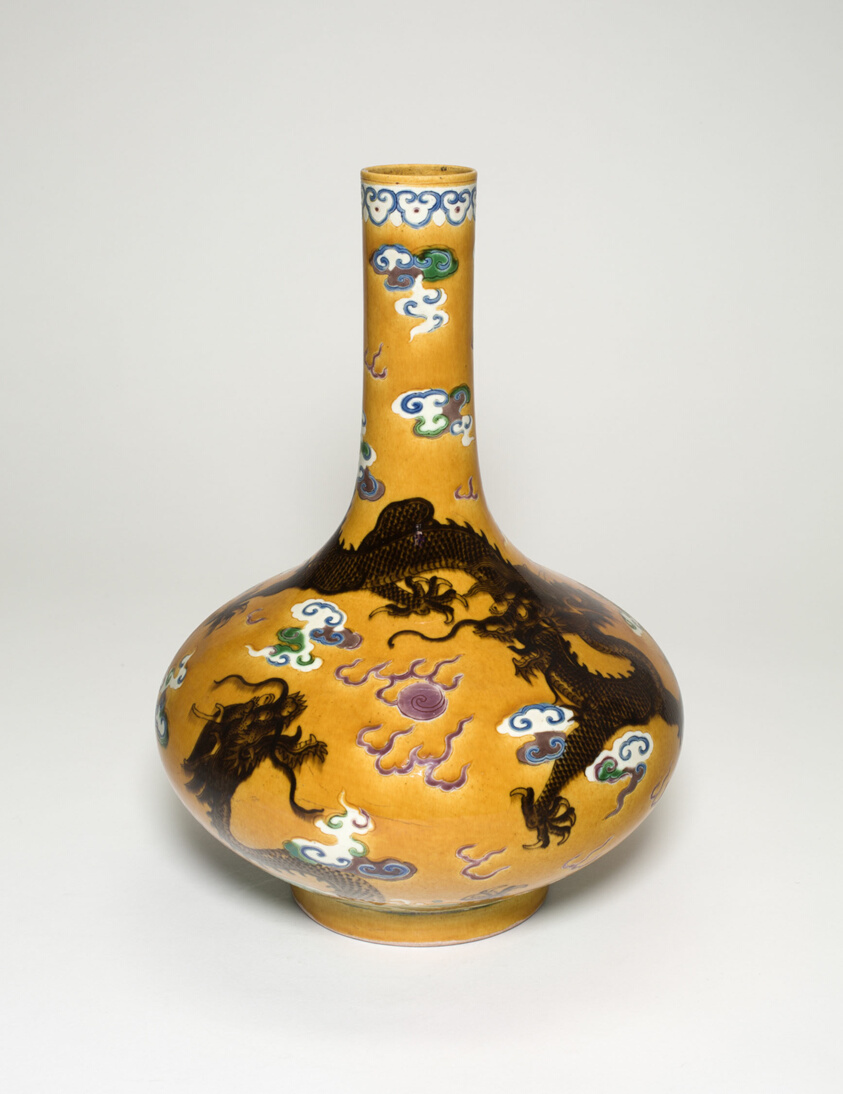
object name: Vessel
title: Enameled bottle vase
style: Chinese (culture or style)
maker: China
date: Qing dynasty (1644–1911)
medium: Porcelain with yellow glaze and overglaze enamel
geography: China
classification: vase; vessel; porcelain; asian art; ceramics